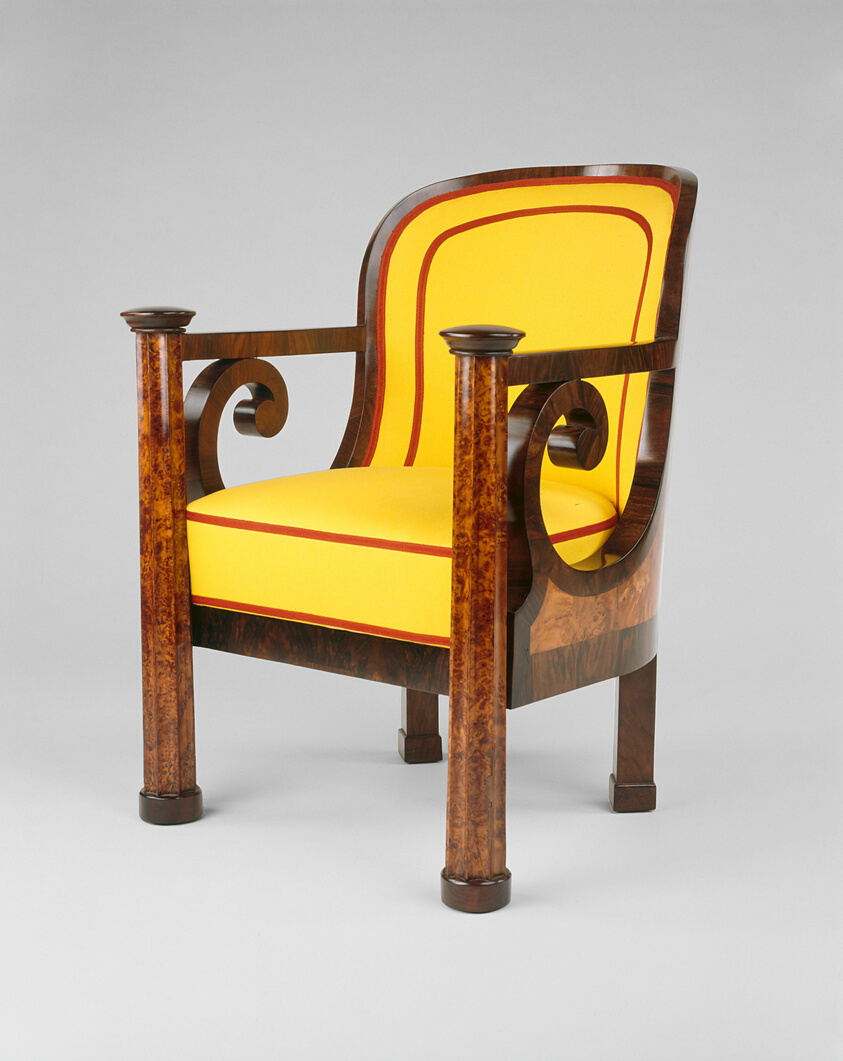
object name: Furniture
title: Armchair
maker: Vienna, Austria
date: 1820–25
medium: Walnut, walnut veneers, and poplar; modern upholstery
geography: Vienna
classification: seating; furniture; european decorative arts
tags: furniture